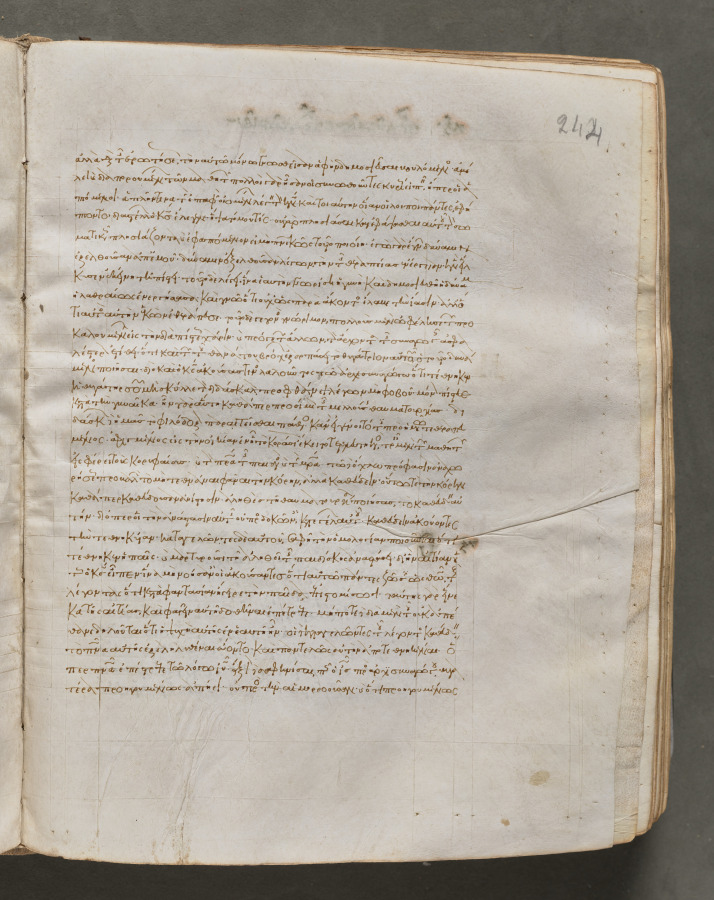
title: Text, folio 244 (recto), from a Gospel Book with Commentaries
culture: Byzantium, Constantinople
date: c. 1000–1100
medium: ink, tempera, and gold on vellum; leather binding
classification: Bound Volume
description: Each of the four gospels in this book opens on a page with brilliantly illuminated borders depicting the author of the text as well as birds—principally peacocks, symbols of the immortality of the soul—and fountains, representing the fountain of life and the salvation of the soul. This volume consists of 428 leaves with texts in Greek. Its level of sophistication suggests that it was probably written and decorated in a monastery in Constantinople.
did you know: Gospel books were carried in procession through Byzantine churches.